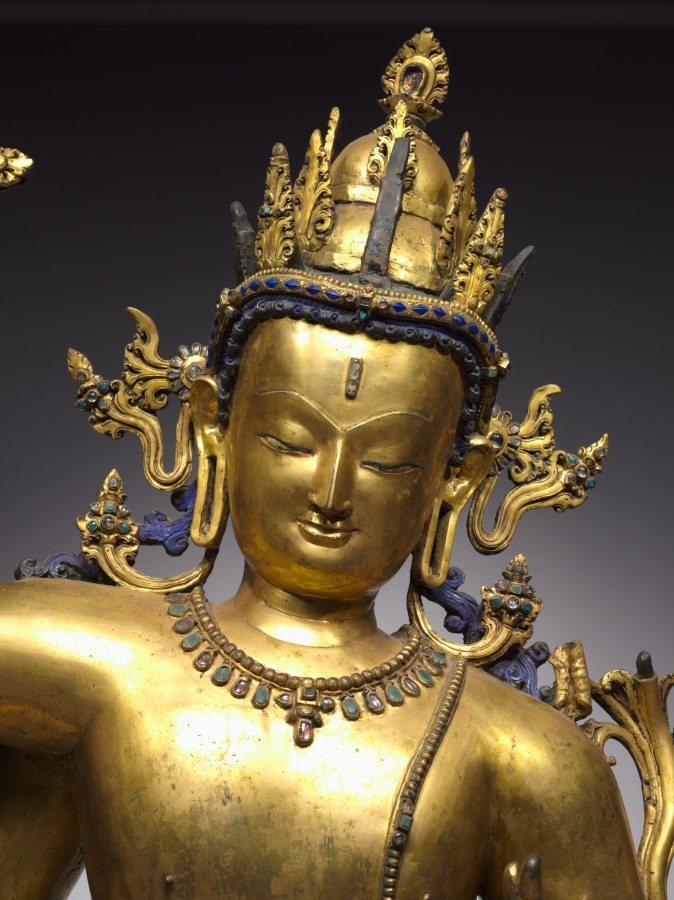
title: Bodhisattva of Wisdom (Manjushri)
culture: Nepal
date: 1400s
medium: Gilt bronze with precious and semiprecious stones, gum tempera, and cold gold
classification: Sculpture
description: This image depicts one of the main bodhisattvas, beings only one stage away from full enlightenment. Because the historical Buddha was a prince prior to his renunciation and life as a wandering ascetic, bodhisattvas are depicted as royal princes. This example has the sharp features, sweet expression, and crisp details characteristic of images made in Nepal during the 1400s. In his upraised right hand Manjushri holds the hilt of a sword that, like wisdom itself, metaphorically cuts through and defeats ignorance. His lower, rear left hand grasps a bow, once probably strung with a wire. Also missing is the arrow that he likely held in his lowered right hand. Arrows were often symbols for mantras, or strings of syllables thought to have the power to focus the mind and work like missiles to destroy negativity and affliction. The gesture of his lowered left hand indicates the transmission of Buddhist teachings. The lotus stem that rises at the left elbows originally held a book of sutras. This figure is in the yogic posture of meditation with the big toe flexed in concentration. Yoga is of central importance in tantric Buddhism, because high-level practitioners are able to discipline the body to such an extent that the mind can also be controlled.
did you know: The bodhisattva's short breeches are patterned in spiraling floral forms incised into the metal.